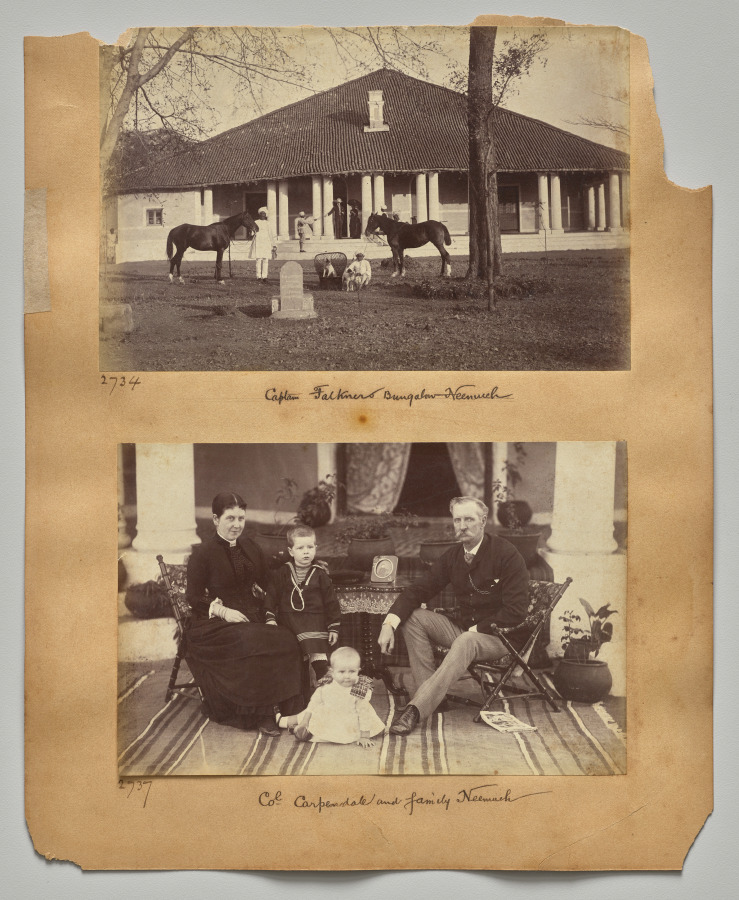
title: Col. Carpendale and family, Neemuch (recto, bottom)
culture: India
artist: Raja Deen Dayal (Indian, 1844–1905)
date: c. 1882–87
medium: albumen print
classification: Photograph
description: These photographs are part of an album, now disassembled, of around 105 photographs taken in India between 1885 and summer 1887 that provide glimpses into the lives of the British colonial elite and royal and upper-class Indians. The museum holds another group of 37 pictures from this album (2016.266), which was probably commissioned by a British civil servant visiting or working in India around 1888 as a personal souvenir of his experiences there.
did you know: Raja Deen Dayal is regarded now, and was considered during his lifetime, to be India’s most important 19th-century photographer.